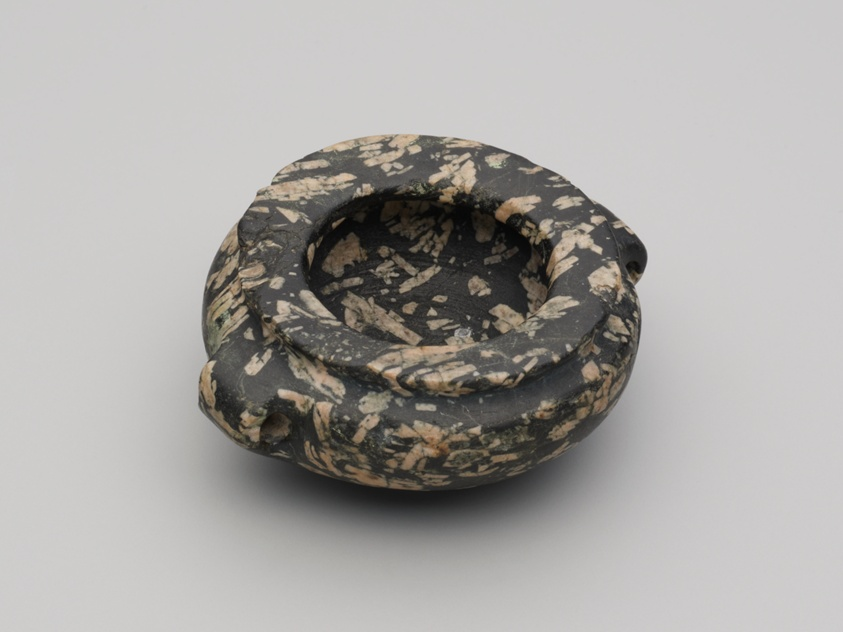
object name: Vessel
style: ancient, egyptian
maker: Egyptian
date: Predynastic Period, Late Naqada II (about 3300–3200 BCE)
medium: Andesite porphyry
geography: Egypt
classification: vessel; stone; ancient art